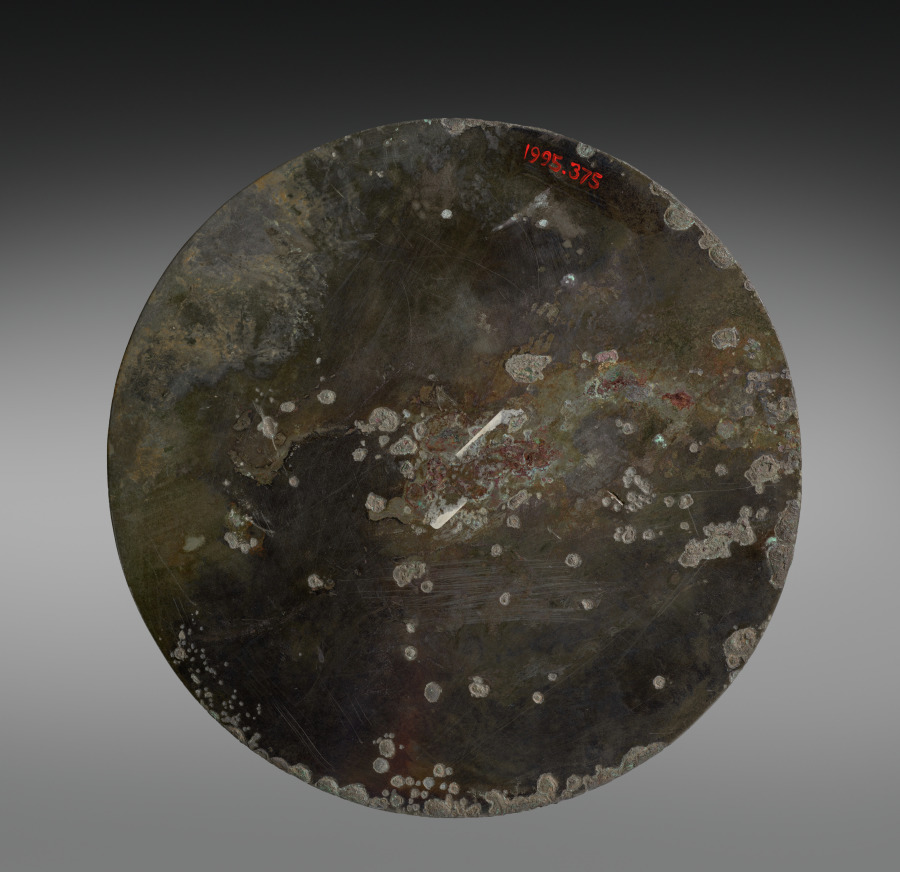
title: Octafoil Mirror with Lunar Palace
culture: China, Jin dynasty (1115–1234)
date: early 1100s–mid-1200s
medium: bronze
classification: Metalwork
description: Bronze mirrors typically have one polished and one decorated side and were used in tombs for ritual purpose or served as disks for reflection. This mirror depicts the imagined scene of the moon in Chinese mythology. Legend says that the goddess Chang E consumed the elixir of immortality that she stole from her husband, the archer Yi, and flew to the moon. Chang E’s palace, the Broad Cold Palace (Guanghan gong) on the left side of the composition, is juxtaposed with a tall pine tree symbolizing longevity.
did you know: A rabbit and a toad, both creatures believed to live on the moon, can be seen in the center.